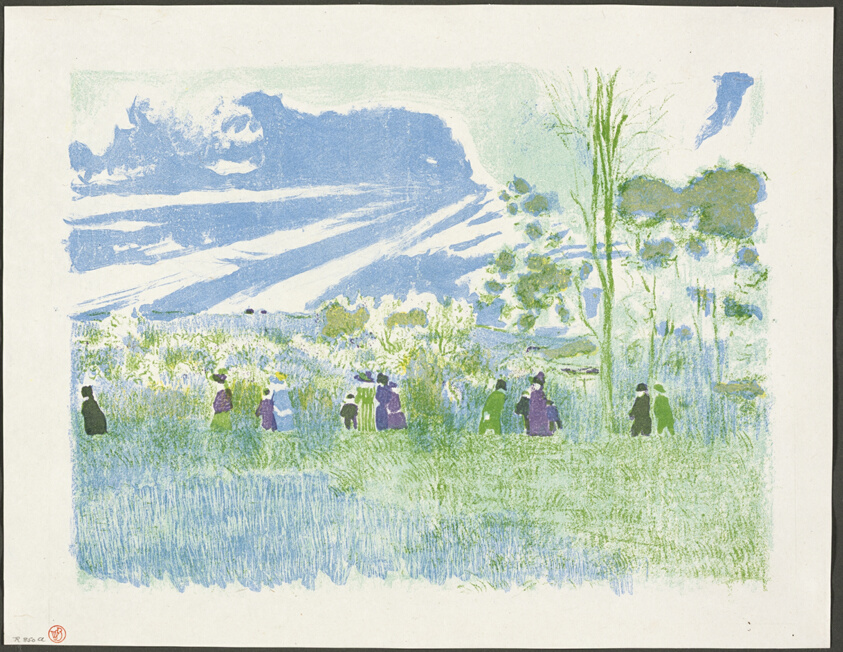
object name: Print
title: Across the Fields, plate three from Landscapes and Interiors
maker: Edouard Jean Vuillard (French, 1868-1940); printed by Auguste Clot (French, 1858-1936); published by Ambroise Vollard (French, 1867-1939)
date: 1899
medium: Color lithograph on grayish-ivory China paper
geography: France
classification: lithograph; print; prints and drawing